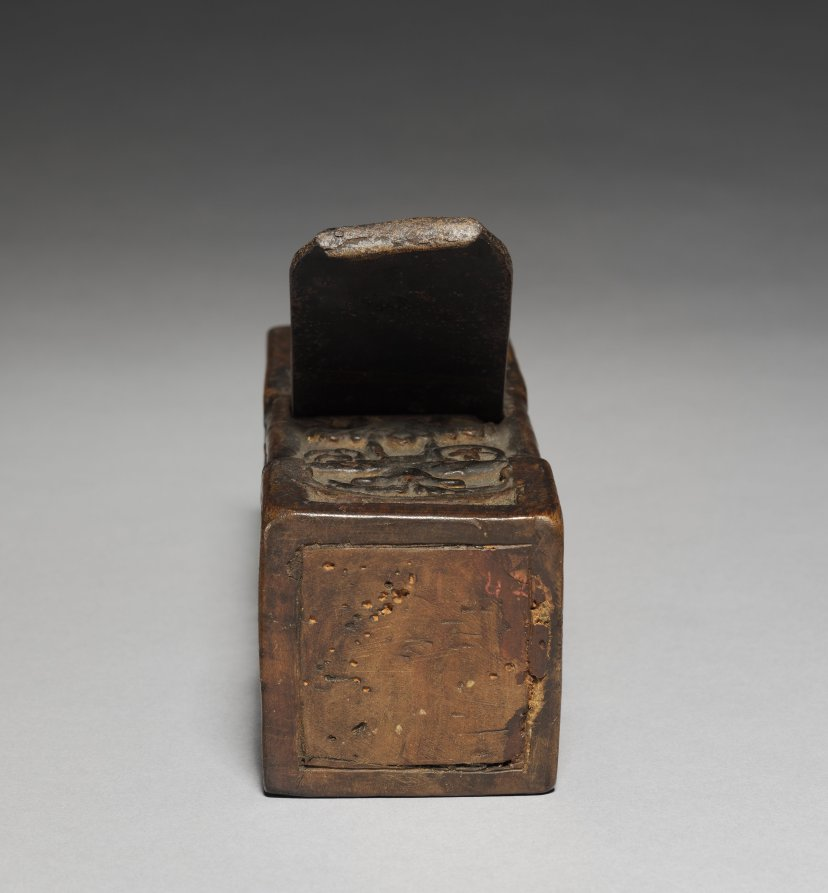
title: Carpenter's Plane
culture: Italy, late 16th century ?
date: late 1500s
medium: wood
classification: Tool